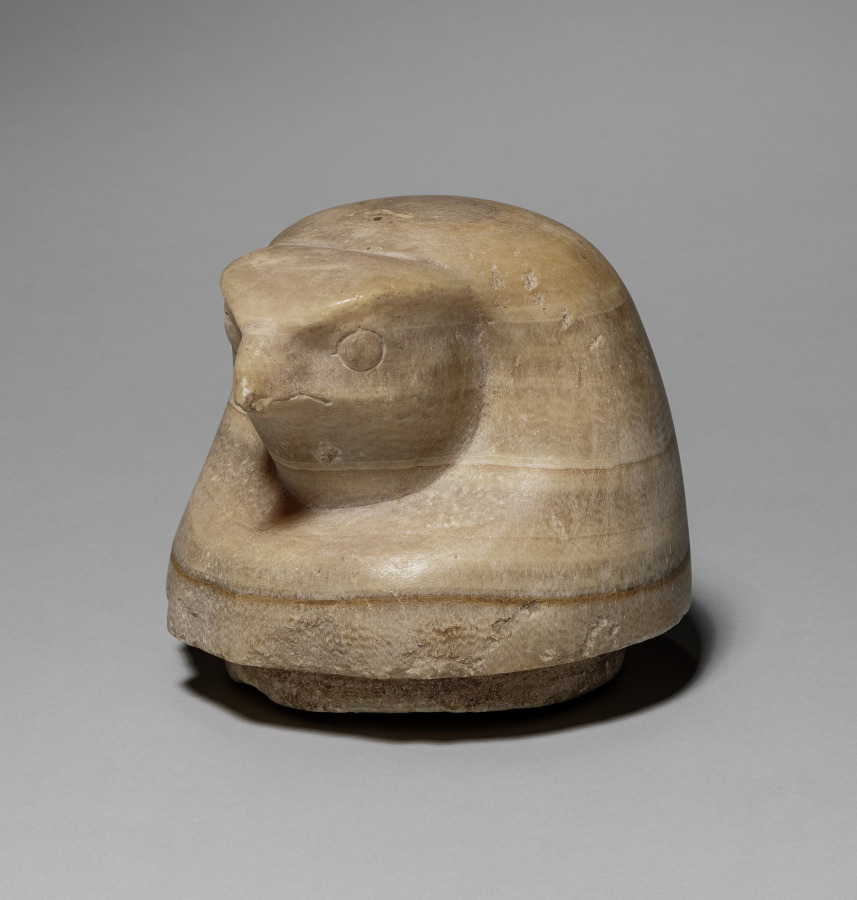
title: Canopic Jar with Falcon's Head (lid)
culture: Egypt, Late period (715–332 BCE), Dynasty 26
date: 664–525 BCE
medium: travertine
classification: Funerary Equipment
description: In the process of mummification, the liver, lungs, stomach, and intestines were removed, separately embalmed, and stored in specialized jars known as canopic jars (after a sailor in Greek mythology, who died at the town of Canopus in the Nile Delta and was worshipped there in the form of a human-headed jar). Each organ was identified with one of four funerary deities collectively known as the Sons of Horus: the liver with Imsety (man's head), the lungs with Hapy (baboon's head), the stomach with Duamutef (jackal's head), and the intestines with Qebehsenuef (falcon's head). It was their duty to protect the deceased and restore to him his body parts in the hereafter.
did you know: The falcon-headed deity Qebehsenuef protected the contents of this canopic jar. It contained the remains of the deceased's intestines, which were kept safe for the afterlife.